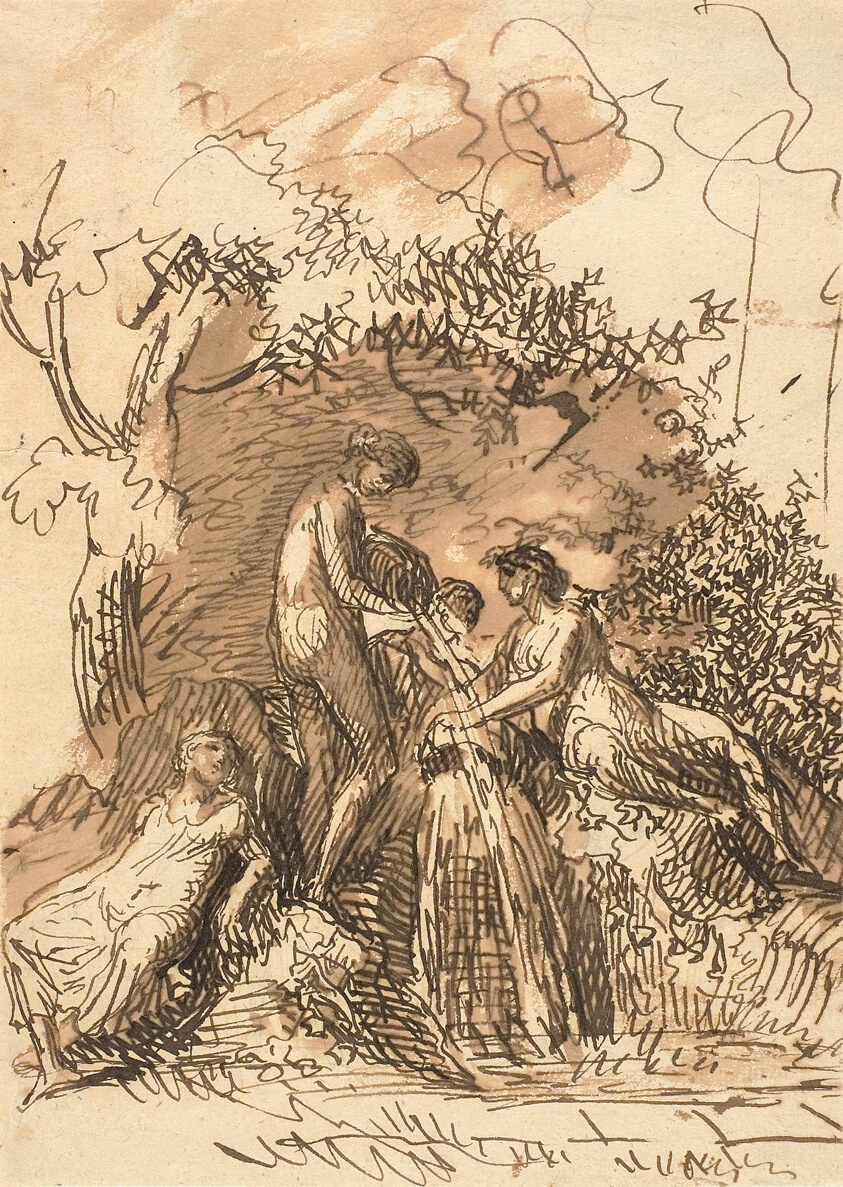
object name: Drawing and Watercolor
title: Young Girls at a Fountain (recto); Fragment of Sketch of Legs (verso)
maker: Johann Christian Reinhart (German, 1761-1847)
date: 1790–1799 (recto); 1781/1847 (verso)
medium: Pen and brown ink with brush and brown wash (recto), and pen and brown ink with touches of graphite (verso), on cream laid paper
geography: Germany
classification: pen and ink drawings; drawings (visual works); prints and drawing